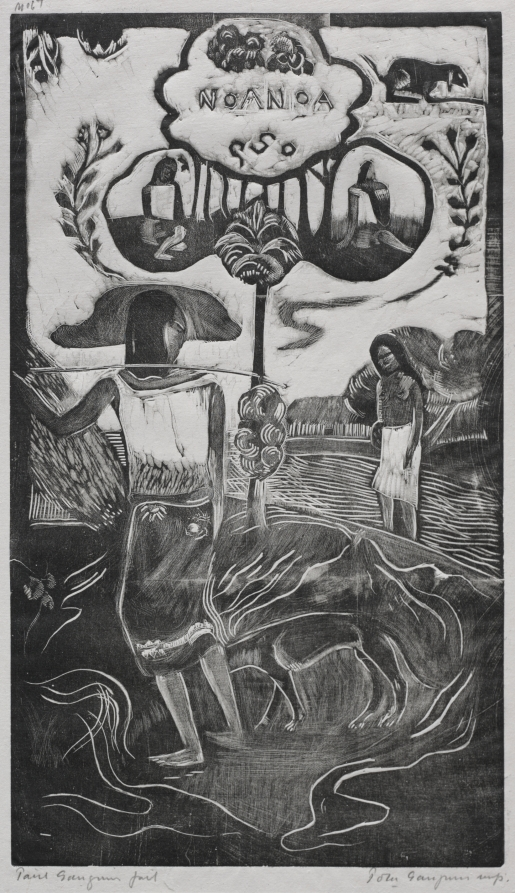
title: Noa Noa: Noa Noa (Fragrant Scent)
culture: France, 19th century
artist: Paul Gauguin (French, 1848–1903)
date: 1893–94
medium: woodcut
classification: Print